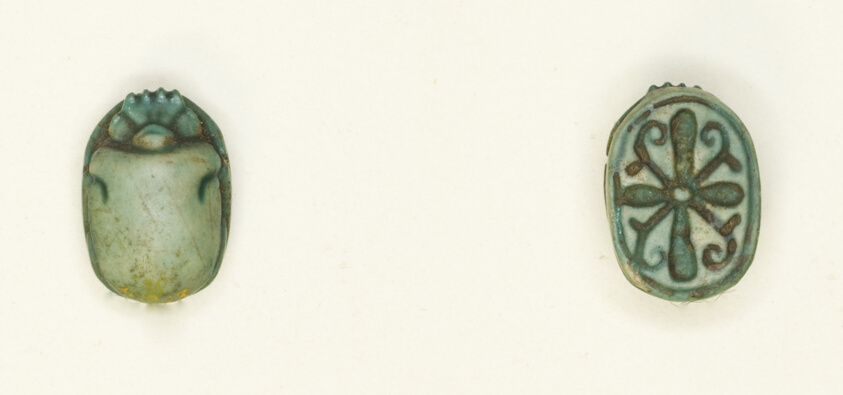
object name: Costume and Accessories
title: Scarab: Cross Pattern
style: second intermediate period, hyksos, fifteenth dynasty, ancient, egyptian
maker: Egyptian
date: Second Intermediate Period, Dynasty 15 (about 1650–1550 BCE)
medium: Glazed steatite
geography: Egypt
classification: scarab; ancient art; costume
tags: scarab beetle, scrolls (motifs), flowers